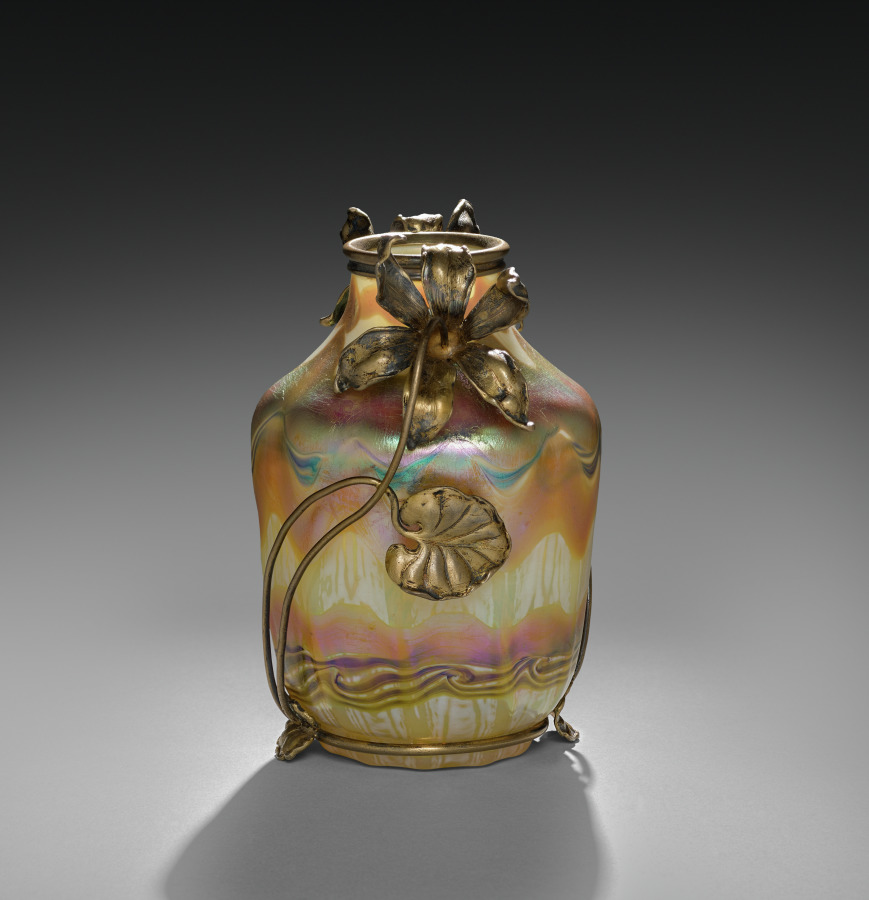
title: Vase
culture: America, New York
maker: Tiffany Glass & Decorating Company (America, New York, 1892–1902)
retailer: Siegfried Bing (German, active in France, 1838–1905)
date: c. 1900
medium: Favrile glass, silver mount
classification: Glass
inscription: Louis C. Tiffany o10301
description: This small vase is made of Louis Comfort Tiffany's signature Favrile glass. Early on when Tiffany began collaborating with glass artists on new types of production, his aesthetic ambitions were realized in the development of Favrile glass, deliberately named to sound French, expensive, and “handmade.” Largely through Tiffany's marketing ability, Favrile glass became America’s greatest contribution to the Art Nouveau style. His works were exhibited at international expositions; galleries in major European cities, where his creations were bought by many museums; and in his store in Manhattan, known as the Tiffany Glass and Decorating Co., later Tiffany Studios. Along with the many shapes and sizes of his decorative vases, Tiffany used Favrile glass in mosaic panels, stained glass windows, and his artistic line of table and floor lamps.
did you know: This vase has French mounts indicating that it was likely sold by Louis Comfort Tiffany's agent in Paris, Siegfried Bing, who helped popularize Tiffany's designs throughout Europe.